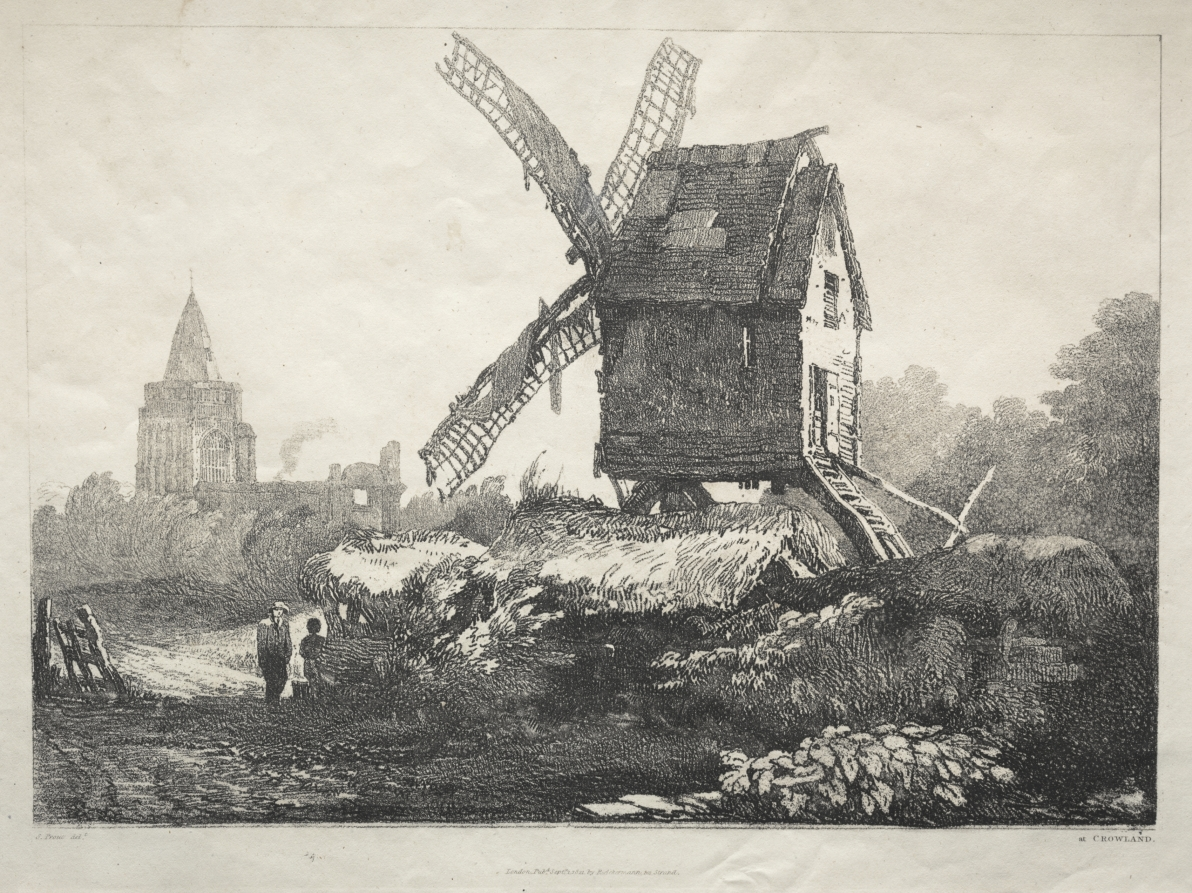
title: A Series of Ancient Buildings and Rural Cottages in the North of England: At Crowland, Windmill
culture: England, 19th century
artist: Samuel Prout (British, 1783–1852)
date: 1821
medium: softground etching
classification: Print